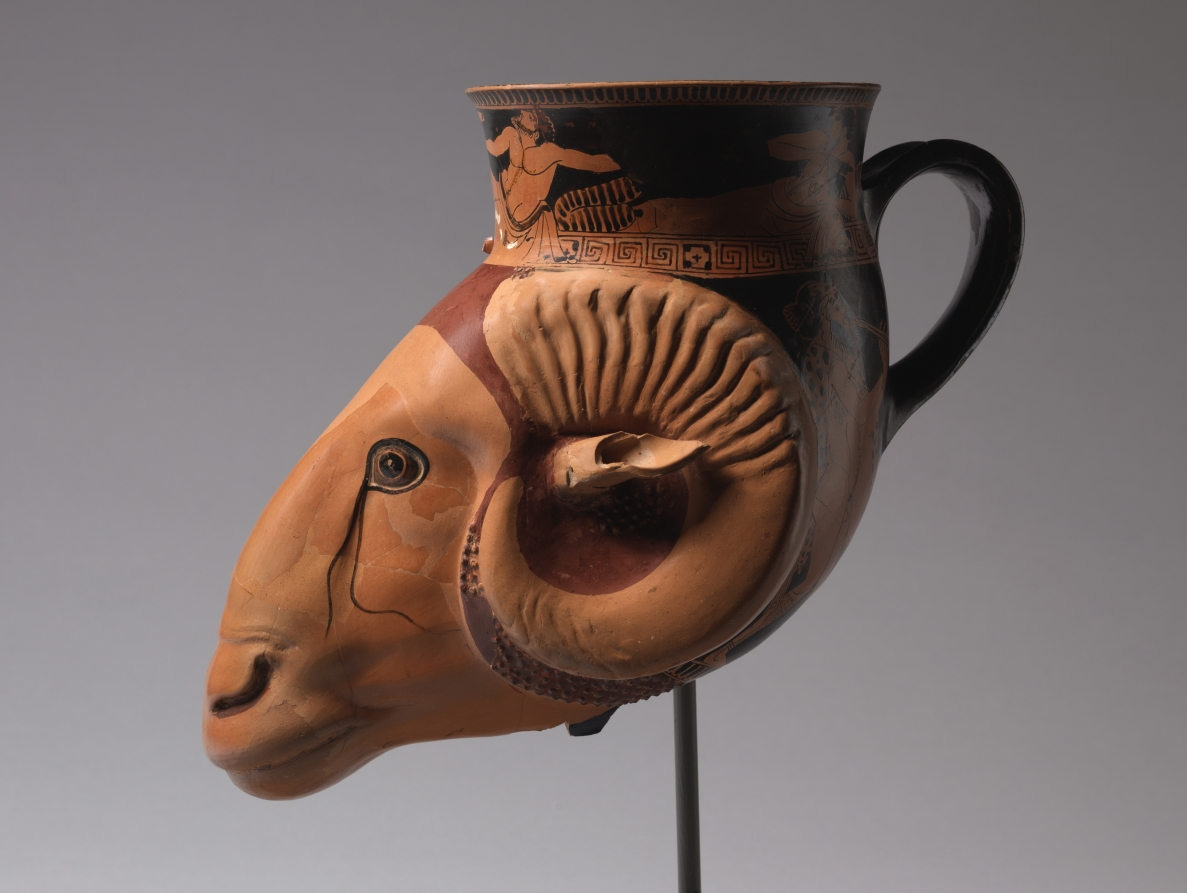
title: Red-Figure Ram-Head Rhyton (Drinking Vessel): Symposiasts; Satyr and Maenad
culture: Greek, Attic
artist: attributed to Brygos Painter (Greek, Attic, active c. 490–470 BCE)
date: c. 480–470 BCE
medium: ceramic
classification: Ceramic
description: Although now missing nearly half of its mold-made ram’s head, this rhyton, a kind of drinking horn, retains most of its painted red-figure sections. On the wheel-made bowl above, three symposiasts recline at a drinking party: a youth wearing a kidaris (flapped Scythian hat) and two bearded men holding drinking cups. The youth plays the pipes, while a lyre hangs nearby and one man throws his head back in song. The letters around them, which do not spell out known words, may allude to the music in the air. Flanking the handle are a pipe-playing satyr and a dancing maenad (only partially preserved).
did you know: This vessel once had a foot, but only a bit of its stem remains.